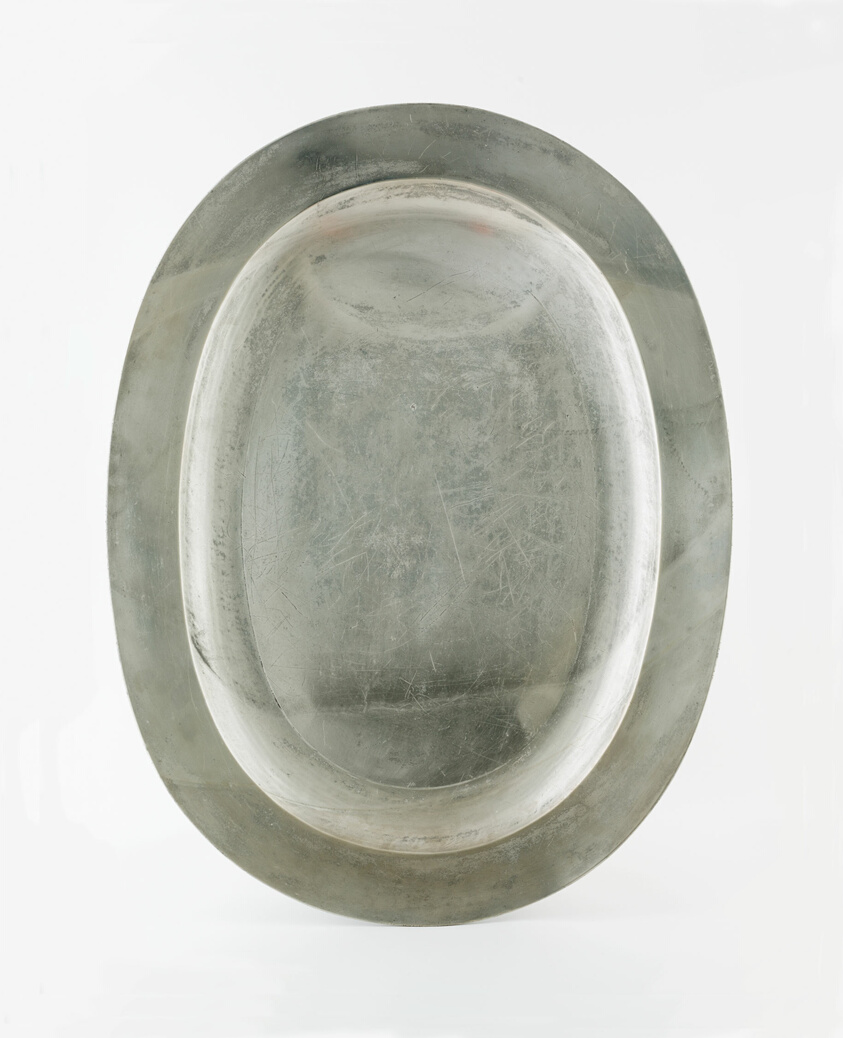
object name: Metalwork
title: Oval Serving Platter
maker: John Ingram; English, active 1767-1799; Birmingham, England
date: 1767/78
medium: Pewter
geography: Birmingham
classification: vessel for serving food; dish (vessel); pewter; metalwork; european decorative arts